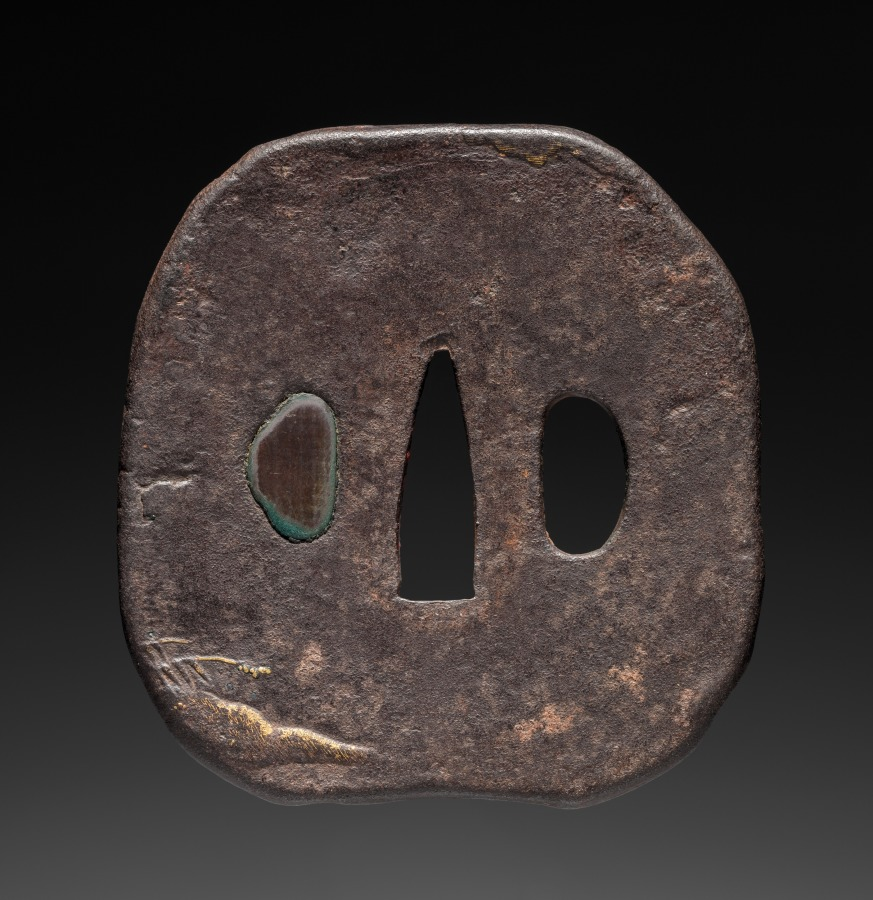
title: Sword Guard (Tsuba) with Oxherd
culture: Japan, possibly Edo period (1615-1868)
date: c. 1615–1868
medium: iron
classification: Arms and Armor